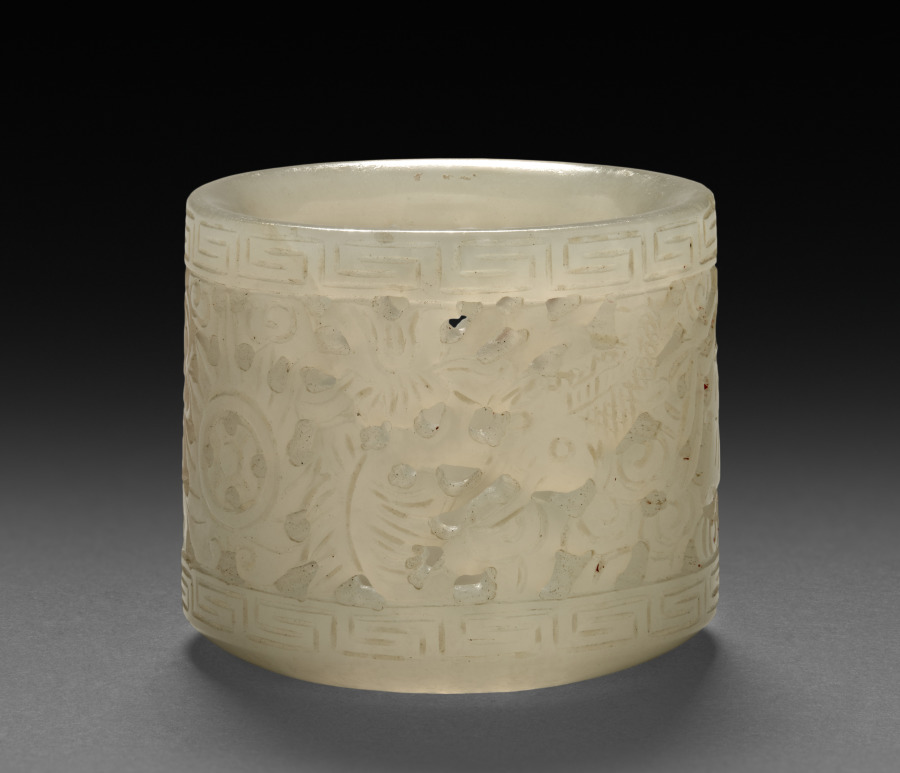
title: Thumb Ring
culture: China, Qing dynasty (1644-1911) or Republican period (1912-49)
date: 1800s–1900s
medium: white jade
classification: Jewelry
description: Jade rings were worn by men on the thumb of the right hand to assist with holding and pulling the string of the archer’s bow. However, thumb rings were also fashionable accessories for civil officials in the late Qing dynasty.